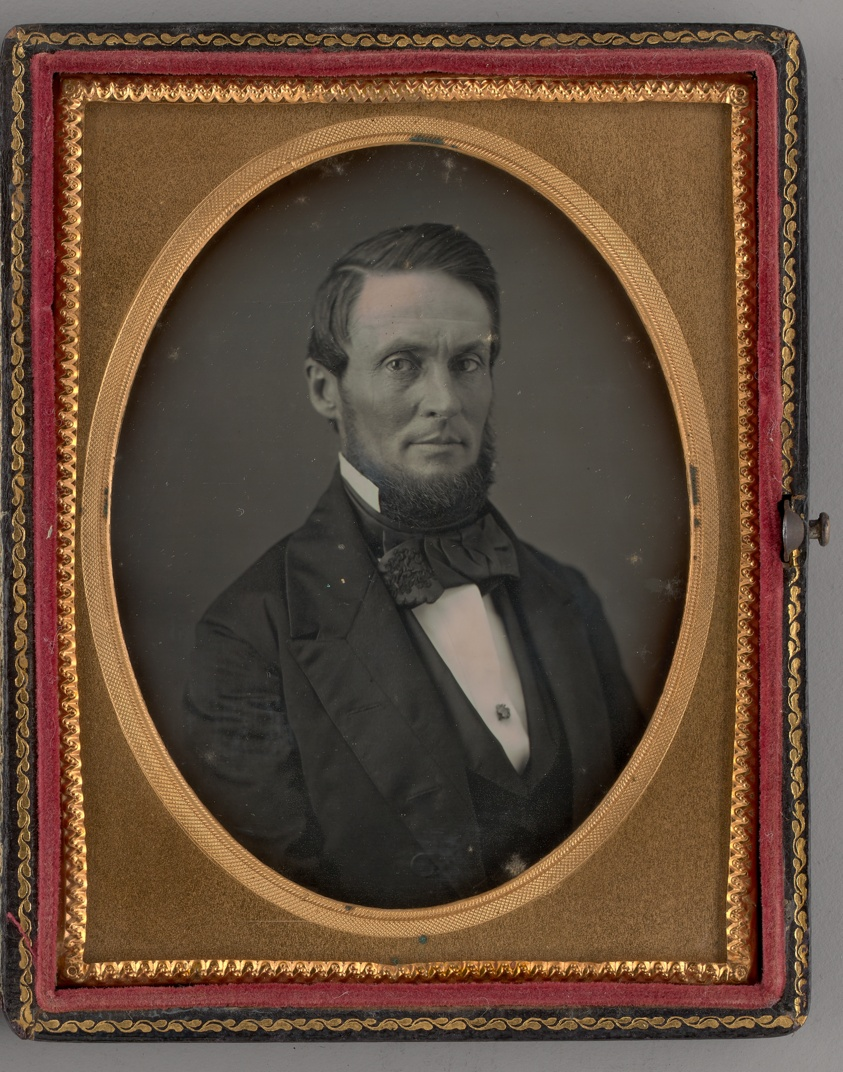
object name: Photograph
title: Untitled (Clement L. Vallandigham, Congressman from Ohio)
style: 19th century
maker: Unknown maker; American, 19th century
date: 1855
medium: Daguerreotype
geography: United States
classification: portrait; photograph; photographic process; photography; portrait; daguerreotype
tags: lundberg collection, portraits, portraits: male subject